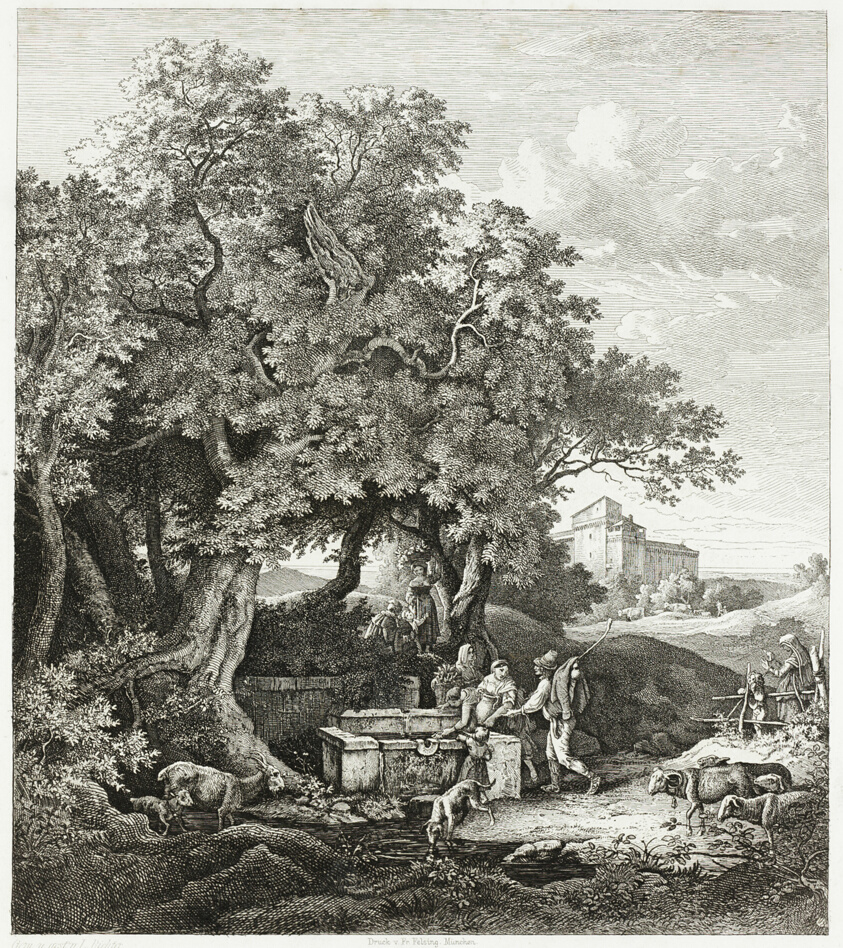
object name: Print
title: Grotta Ferrata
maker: Adrian Ludwig Richter; German, 1803-1884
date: 1832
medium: Etching with engraving in black on ivory wove paper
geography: Germany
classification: etching; paper; print; prints and drawing